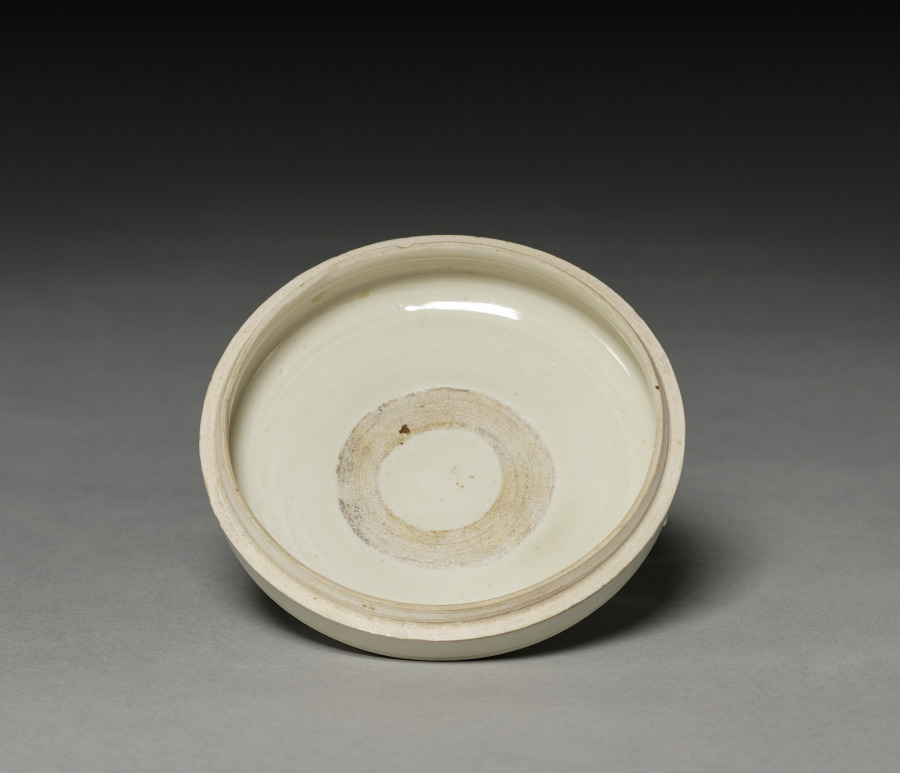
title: Covered Box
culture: China, Hebei province, Quyang, Northern Song dynasty (960-1127) to Jin dynasty (1115-1234)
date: 1100s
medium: cream-glazed porcelain with incised decoration, Ding ware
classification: Ceramic